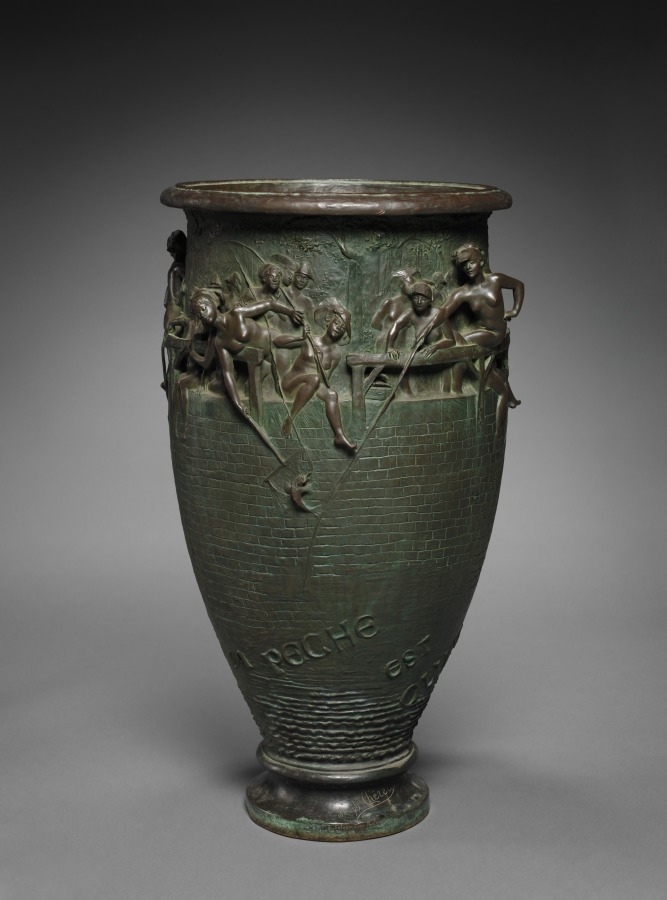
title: Vase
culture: France, 19th century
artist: Gustave-Joseph Chéret (French, 1838–1894)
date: c. 1890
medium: bronze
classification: Sculpture